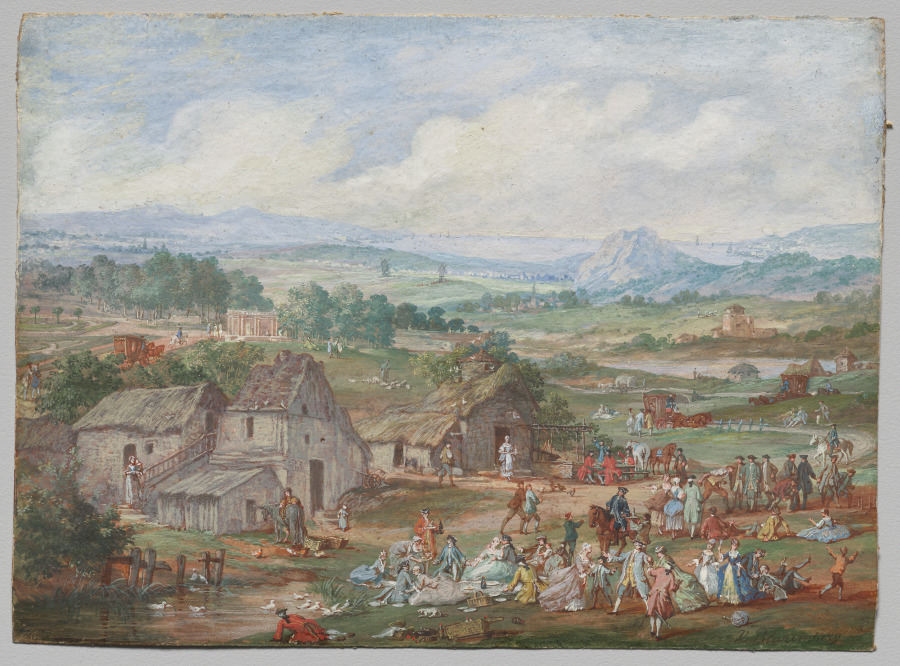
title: A Party Picnicking Near a Village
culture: France, 18th century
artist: Louis Nicolas van Blarenberghe (French, 1716–1794)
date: c. 1760–70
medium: gouache on antique laid paper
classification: Drawing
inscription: Watermark: partial letters, illegible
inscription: signed, lower right, black ink, “V Blarenberg”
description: Louis Nicolas van Blarenberghe was known for drawings such as this one, which were executed on a small scale with exacting detail. His designs attracted the attention of the French monarchy, and he received numerous royal commissions. This work shows well-dressed figures enjoying outdoor leisure in a rural village. Its panoramic landscape and dense crowd were both characteristic of Van Blarenberghe’s miniaturist style.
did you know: Louis Nicolas van Blarenberghe was from a family of painters; among them he was known as “the great Blarenberghe.”